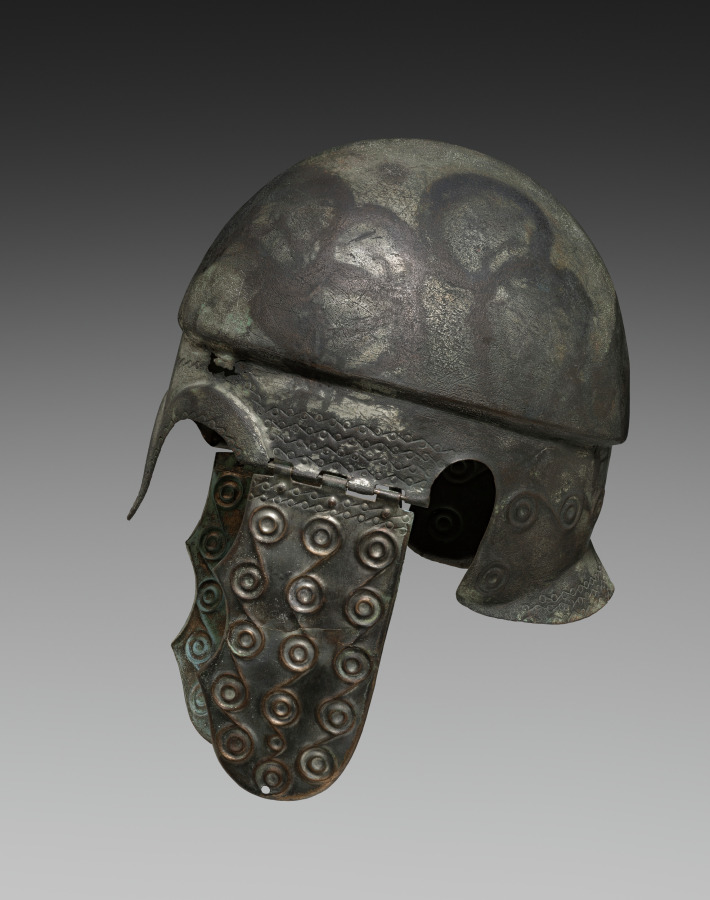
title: Chalcidian Helmet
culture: Greek (perhaps Black Sea area)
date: c. 350–200 BCE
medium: Tinned bronze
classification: Arms and Armor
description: Among ancient helmets, the Chalcidian type is varied, widespread, and comparatively unrestrictive, with relatively wide openings for the eyes and ears. This example, probably made in the Black Sea region or even further east, features a pointed noseguard, high carinated crown, molded brow ridge, and everted rear flange, plus large separately made hinged cheekpieces. The tinned bronze surface is almost silver in color, with extensive decoration including small incised linked scrolls and much larger embossed linked scrolls.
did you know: Although named for Chalcis, a city in Euboia, Chalcidean helmets were made across the Greek world.